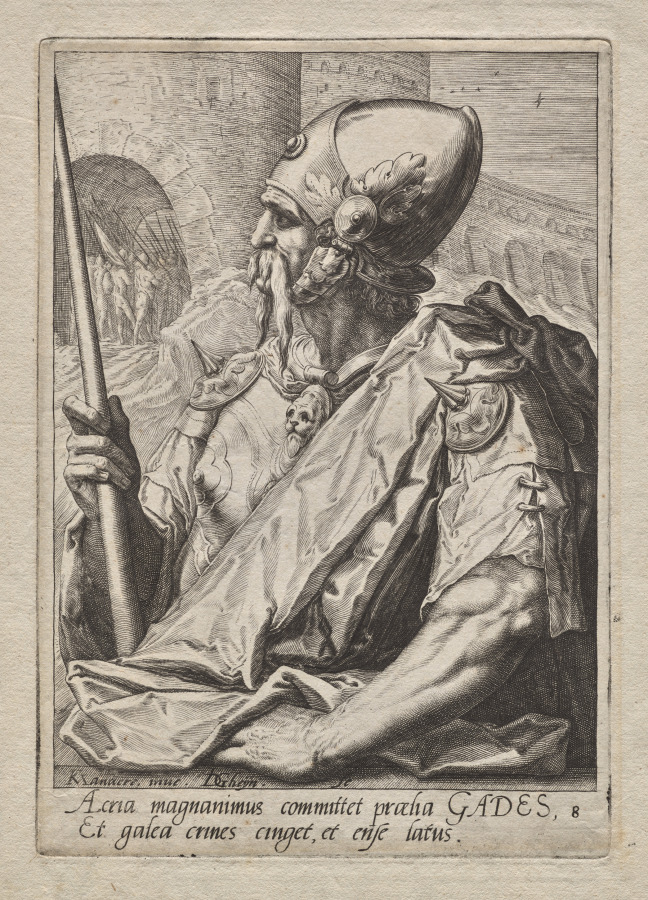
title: Plate 8: Gad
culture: Netherlands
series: The Twelve Sons of Jacob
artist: Jacob de Gheyn II (Netherlandish, 1565–1629)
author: after Karel I van Mander (Netherlandish, 1548–1606)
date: c. 1589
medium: engraving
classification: Print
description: In this print, the biblical figure Gad holds a spear and wears a suit of armor while a militia gathers behind him, denoting his preparedness for battle. This is one of a series of prints depicting the twelve sons of Jacob, each with an attribute and costume that denotes his character. According to the Old Testament, Jacob blessed each of his twelve sons, prophesizing the destiny of their tribe, and assigning them a parcel of land in Canaan. The print series was made in the Netherlands in the late 16th century, a time of political struggle when Old Testament heroes were popular exemplars of fortitude and patience.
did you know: The upright, profile view of this Old Testament figure dressed in armor helps to characterize his military pursuits as noble in nature.